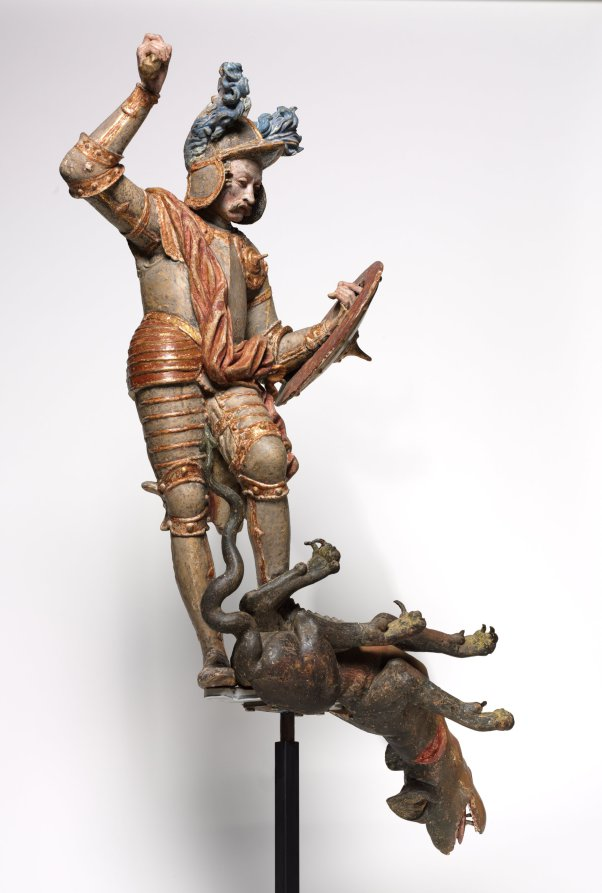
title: Saint George and the Dragon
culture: South Germany or Austria, late 17th century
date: late 1600s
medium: painted and gilded wood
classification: Sculpture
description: Saint George, a Roman soldier martyred for his Christian faith, is best known for slaying a fearsome dragon that terrorized the city of Silene, in Libya. George offered to kill the monster if residents of the city convert to Christianity. Here, George stands triumphantly over the dragon, writhing as it dies. The artist deliberately incorporated features intended to make his figure seem more familiar: the dragon seems more canine than reptilian, while George wears armor from the recent past and bears almost portrait-like facial features.